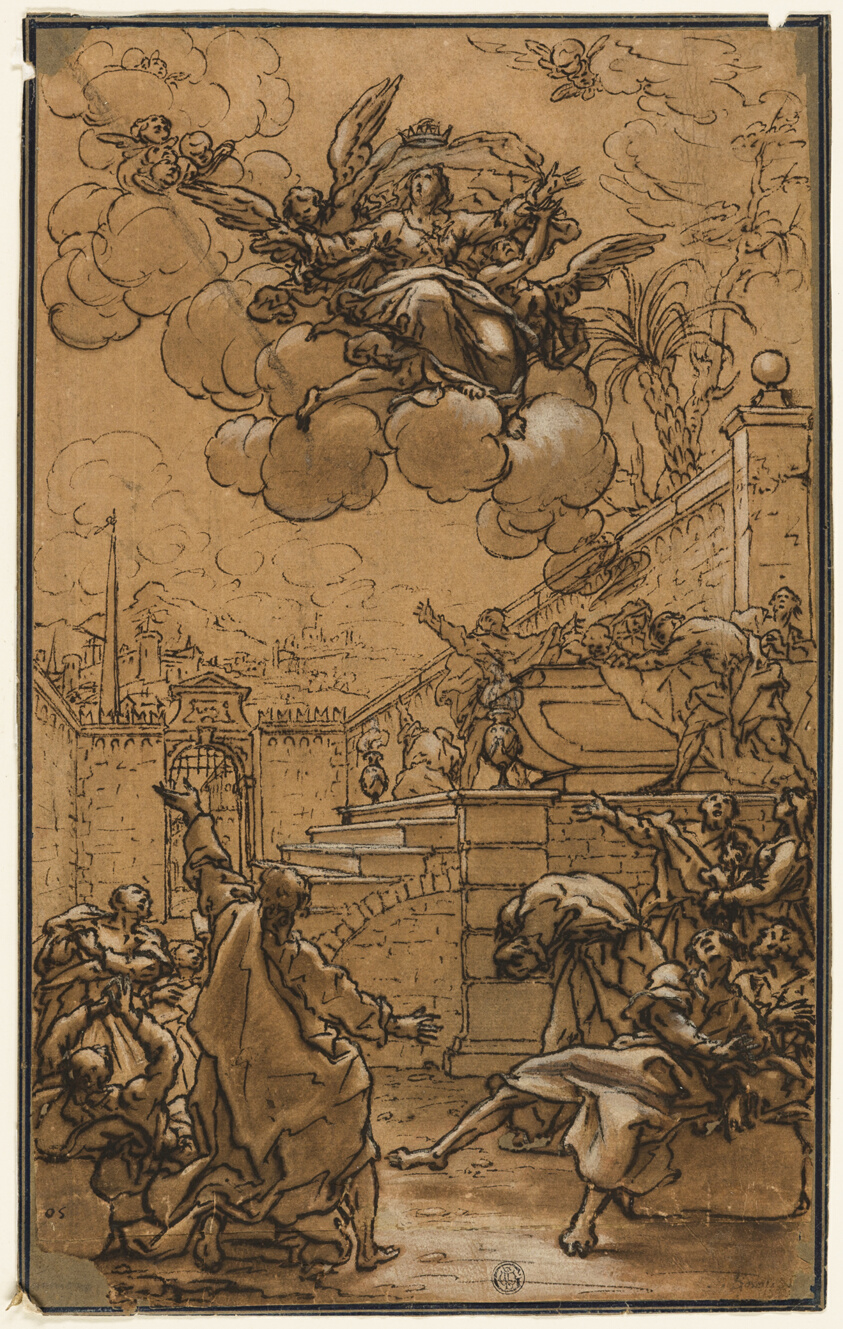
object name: Drawing and Watercolor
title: The Assumption of the Virgin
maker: Possibly Jacopo Robusti, called Tintoretto (Italian, 1519-1594); or possibly John Devoto (England, active 1719-1776)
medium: Pen and iron gall ink with brush and brown wash, heightened with white gouache, on tan laid paper, pieced together and laid down on gray laid paper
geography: Italy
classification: pen and ink drawings; drawings (visual works); prints and drawing